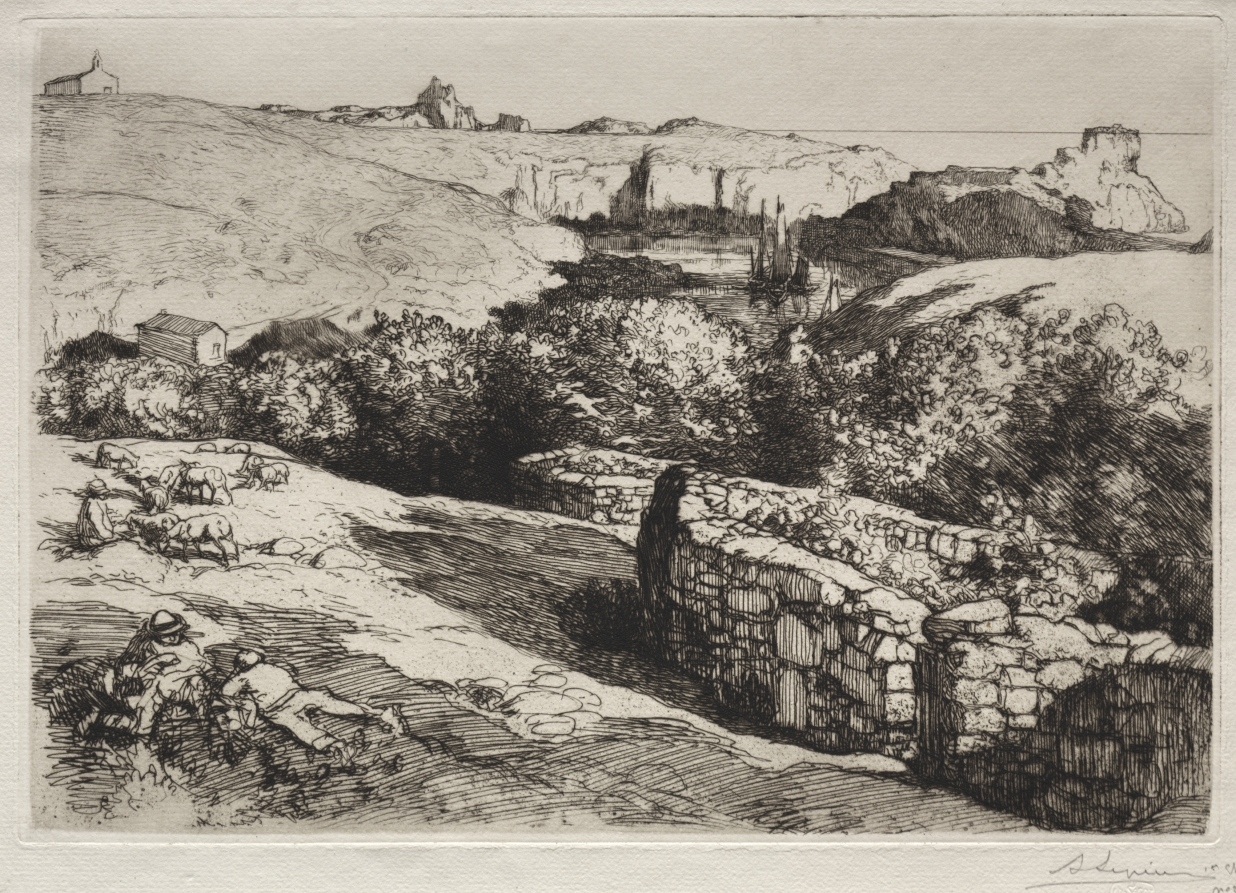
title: Vue du Port de la Meule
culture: France, 20th century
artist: Auguste Louis Lepère (French, 1849–1918)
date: 1907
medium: etching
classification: Print